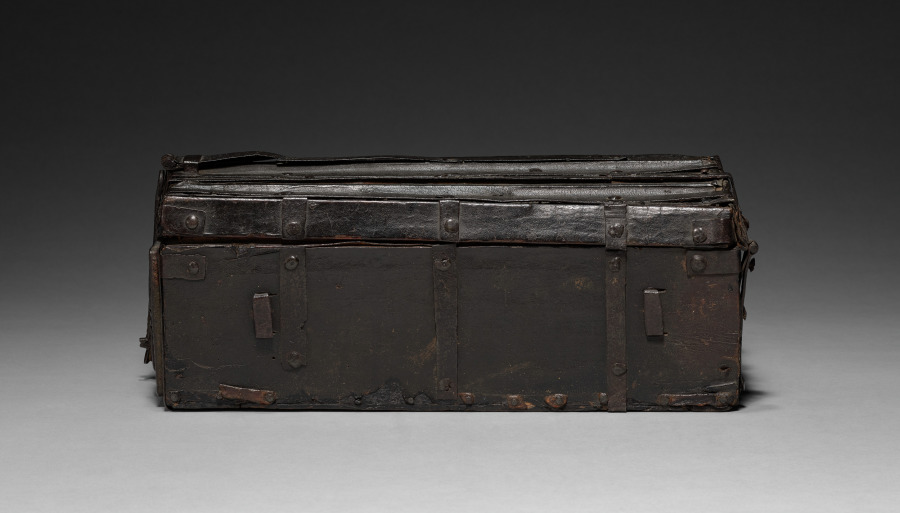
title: Coffret with Woodcut of Saint Veronica's Vernicle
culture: Coffret: France, probably Paris; Woodcut: Germany, Augsburg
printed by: Hans Burgkmair the Elder (German, 1473–1531)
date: Coffret: c. 1515; Woodcut: c. 1509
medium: Wood, leather, iron, textile, woodcut with stenciled coloring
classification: Print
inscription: SALVE. XPI. EFFIGIES. SACERRI[M]A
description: This remarkable object is thought to have functioned as a traveling case to keep small valuables and books, as well as a provisional altar. Made in France around 1515, the interior lid is affixed with a devotional woodcut made in Germany, imported, and colored for the purpose. Featuring an image of the veil of Saint Veronica, the text at the bottom of the woodcut guides the user in prayer to the holy image of Christ’s face which has been miraculously imprinted on the veil, an action that held promise of indulgences (a reduction in one’s punishment for sins). Presumably, the owner carried the box on a journey, retrieved a prayer book from inside, and propped it open in order to practice daily prayers.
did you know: A secret compartment on the top lid of this coffer may have held a relic, consecrated host, or valuable document.